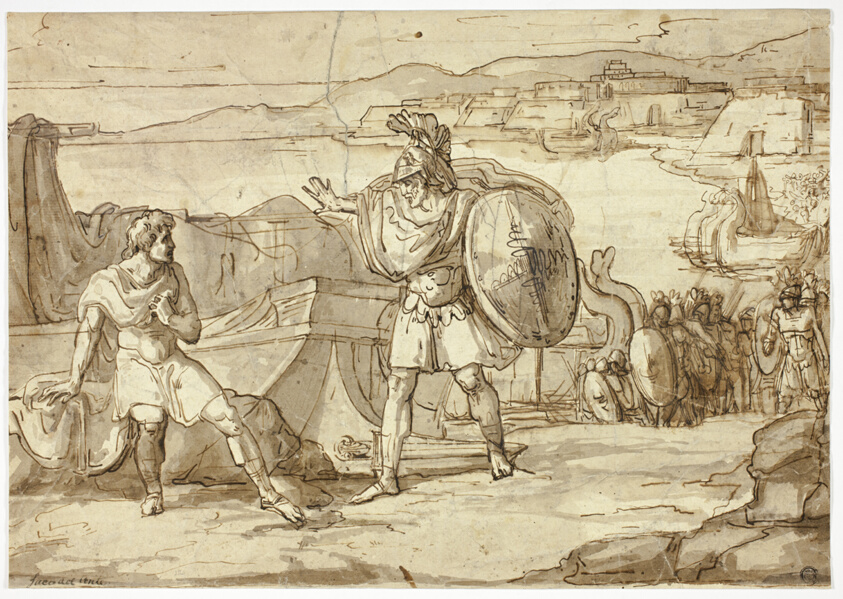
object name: Drawing and Watercolor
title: Scene from the Iliad: Confrontation of Two Warriors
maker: Jacopino del Conte (Italian, 1510-1598); or Vincenzo Camuccini (Italian, 1771-1844)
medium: Pen and brown ink with brush and brown wash and touches of black crayon on cream laid paper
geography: Italy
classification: pen and ink drawings; drawings (visual works); prints and drawing